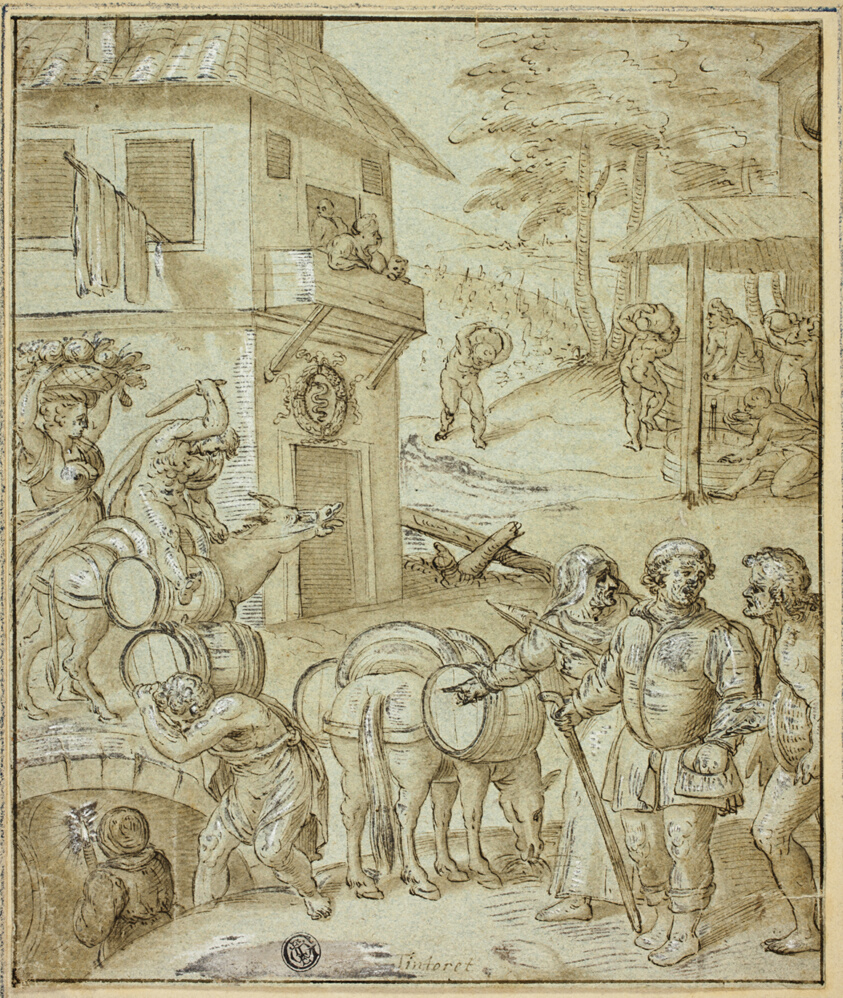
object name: Drawing and Watercolor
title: Wine Harvest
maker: Jacopo Robusti, called Tintoretto (Italian, 1519-1594); or Frans Floris, I (Flemish, 1516-1570); or Willem Key (Flemish, c. 1515-1568)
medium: Pen and brown ink, with brush and brown wash, heightened with lead white, on blue laid paper, tipped onto card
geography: Italy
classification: pen and ink drawings; drawings (visual works); prints and drawing